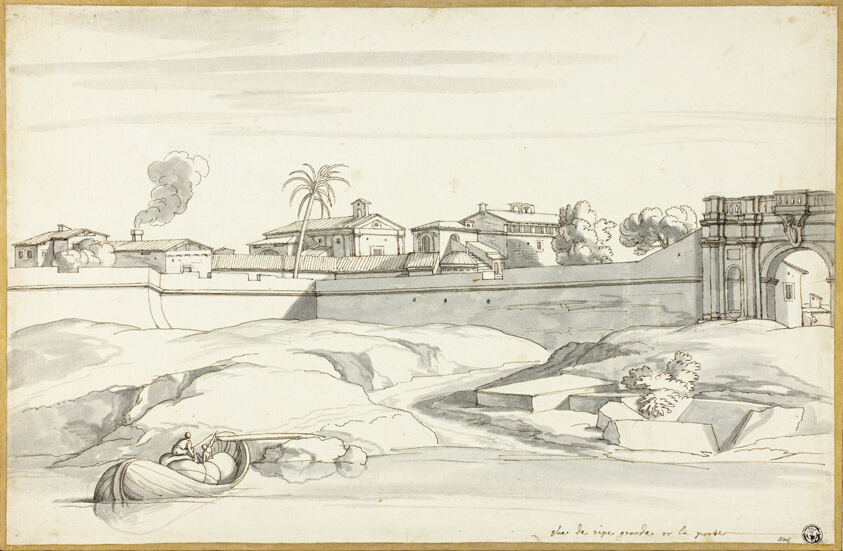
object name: Drawing and Watercolor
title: Landscape along a River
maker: Attributed to Michel Ange Houasse; French, 1680-1730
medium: Pen and brown ink, with brush and gray wash, over black chalk, on ivory laid paper, laid down on cream laid paper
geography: France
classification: pen and ink drawings; drawings (visual works); prints and drawing